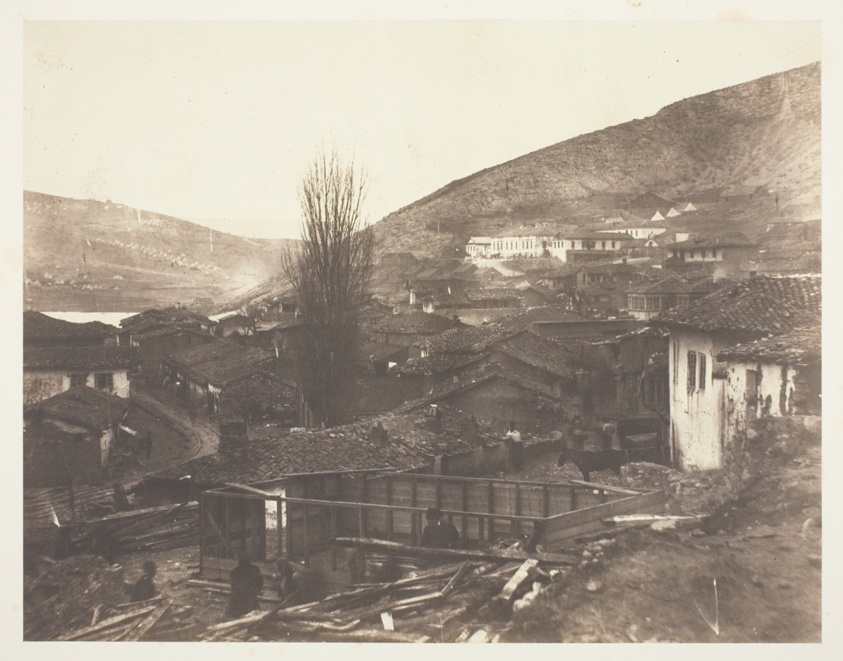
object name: Photograph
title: The Railway Street at Balaklava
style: 19th century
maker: Roger Fenton (English, 1819–1869)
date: 1855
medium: Salted paper print, from the album "Photographic Pictures of the Seat of War in the Crimea" (1856)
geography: England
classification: salted paper print; photographic process; photography; photograph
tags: Collected by Hugh Edwards